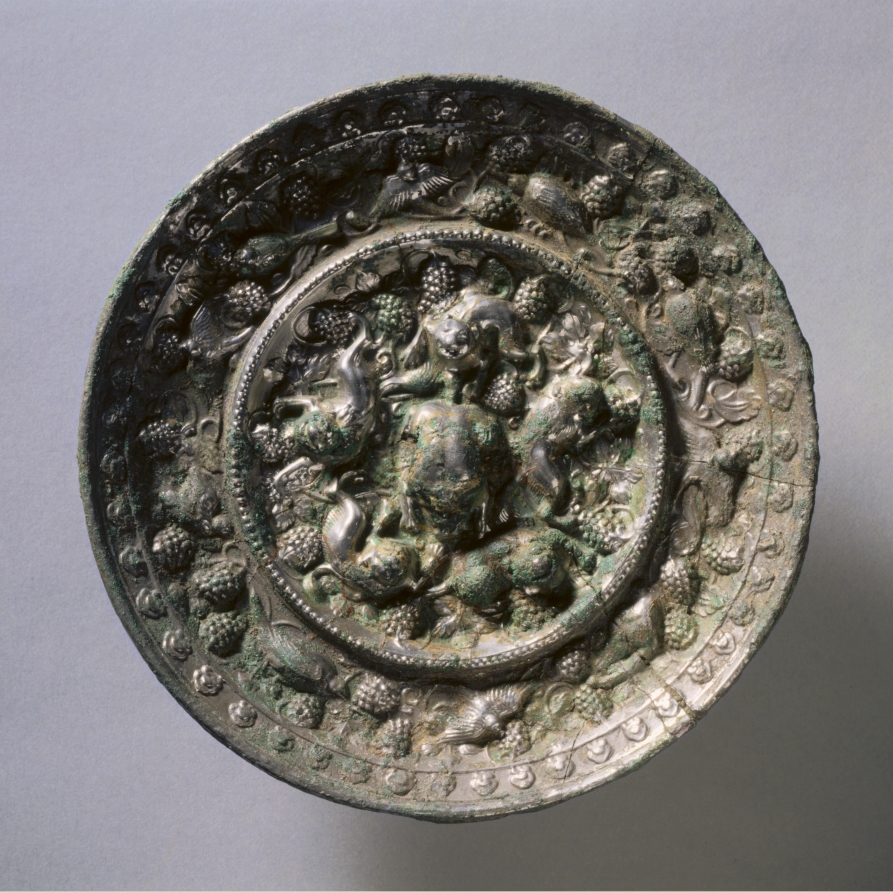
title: Animal-and-Grape Mirror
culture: China, Tang dynasty (618-907)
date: early 600s-early 900s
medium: bronze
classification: Metalwork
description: The mirror was cast using lost-wax technology. Little finishing work is evident on the back. Extensive cracking, typical of high tin mirrors is evident.